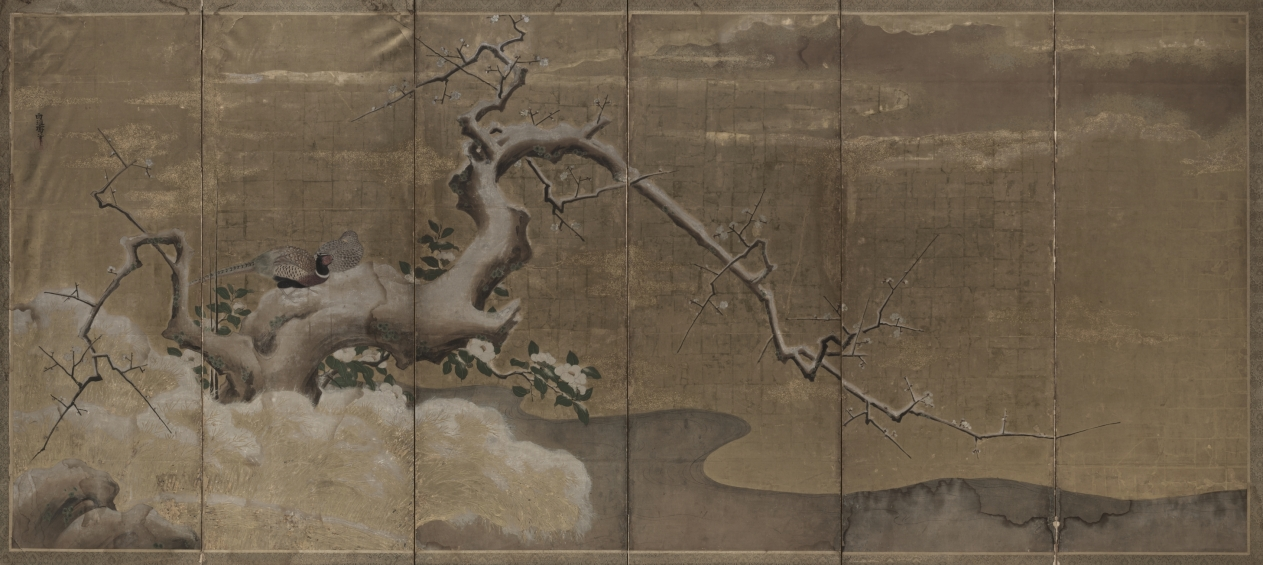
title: Winter Scene with Plum Trees and Pheasants (Birds Right)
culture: Japan, Edo period (1615–1868)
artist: Kano Naonobu (Japanese, 1607–1650)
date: early 1600s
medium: pair of six-fold screens, mineral pigments and gold leaf on paper,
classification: Painting